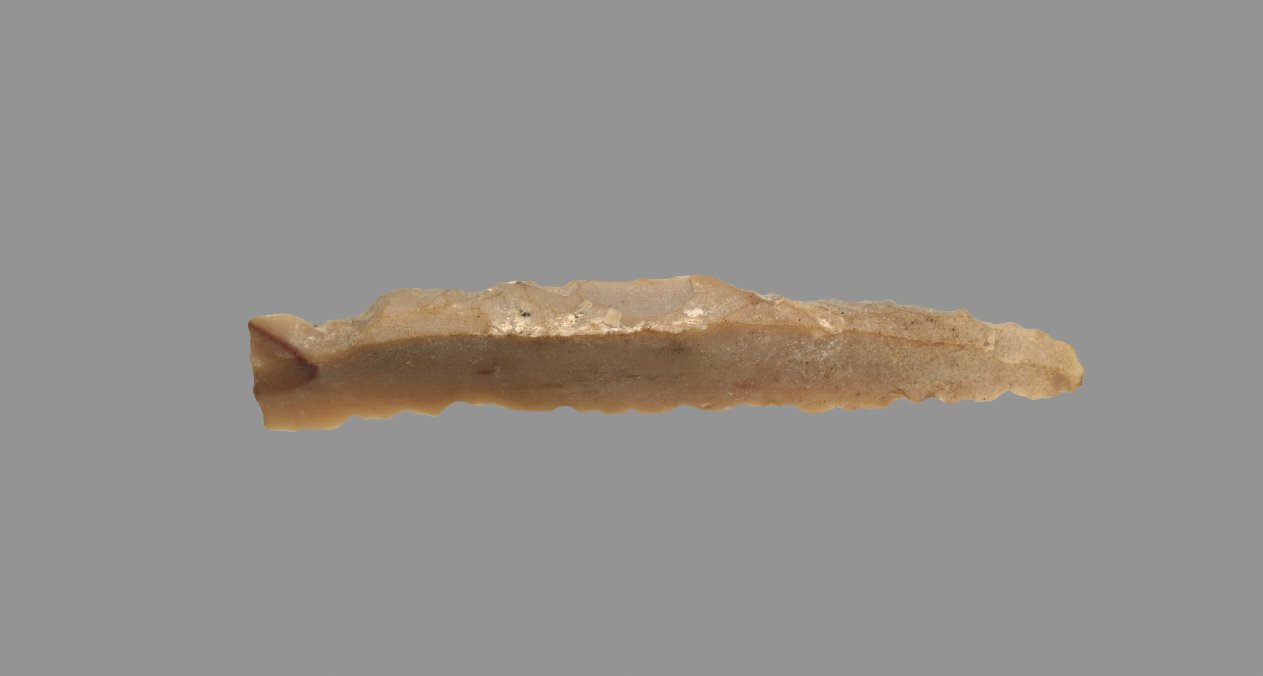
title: Sickle Blade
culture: Egypt, Middle Kingdom (2040–1648 BCE), Dynasty 12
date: 1980–1801 BCE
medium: flint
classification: Implements